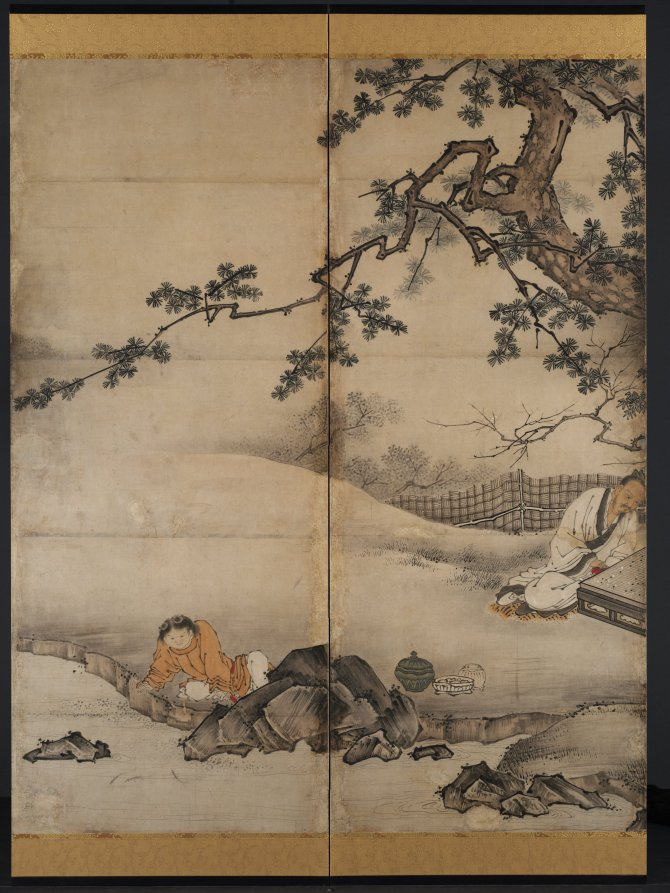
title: The Four Accomplishments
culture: Japan, Momoyama period (1573–1615)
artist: attributed to Kano Shōei (Japanese, 1519–1592)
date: late 1500s–early 1600s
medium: One of a pair of six-panel folding screens; ink and slight color on paper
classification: Painting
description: This is one of a pair of screens that shows a group of elite Chinese gentlemen and their servants in the countryside. One man looks on as two of his companions play a board game. Nearby is a table set with a selection of books and a qin, a type of stringed instrument, still wrapped in its cloth case, waiting to be played. The mood is one of enjoyment balanced with formality. Historically, playing the qin or qi (a game similar to chess called go in Japan), and practicing or admiring calligraphy were considered three skills essential for cultured men in China.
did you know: One of the servants is diverted by the motion of a fish in the water.